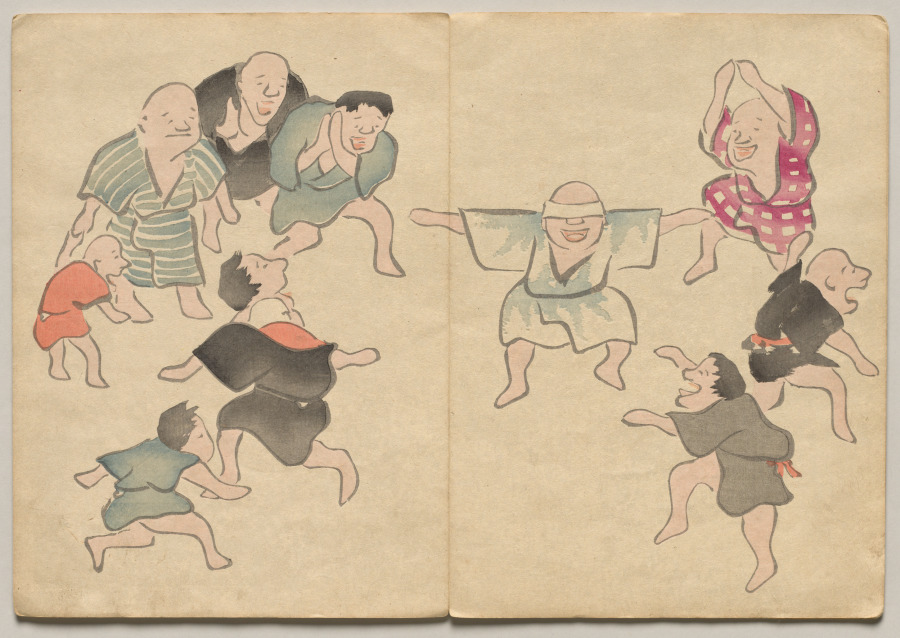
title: Scene from The Kōrin Picture Book (Volume 1)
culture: Japan, Edo period (1615–1868)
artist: Nakamura Hōchū (Japanese, d. 1819)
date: 1800s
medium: color woodblock printed book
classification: Bound Volume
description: Ogata Korin (1658-1716) was one of the most admired artists of Rimpa, or "decorative school painting." These books by the charming later-generation Rimpa artist Hochu record Korin's inventive designs.